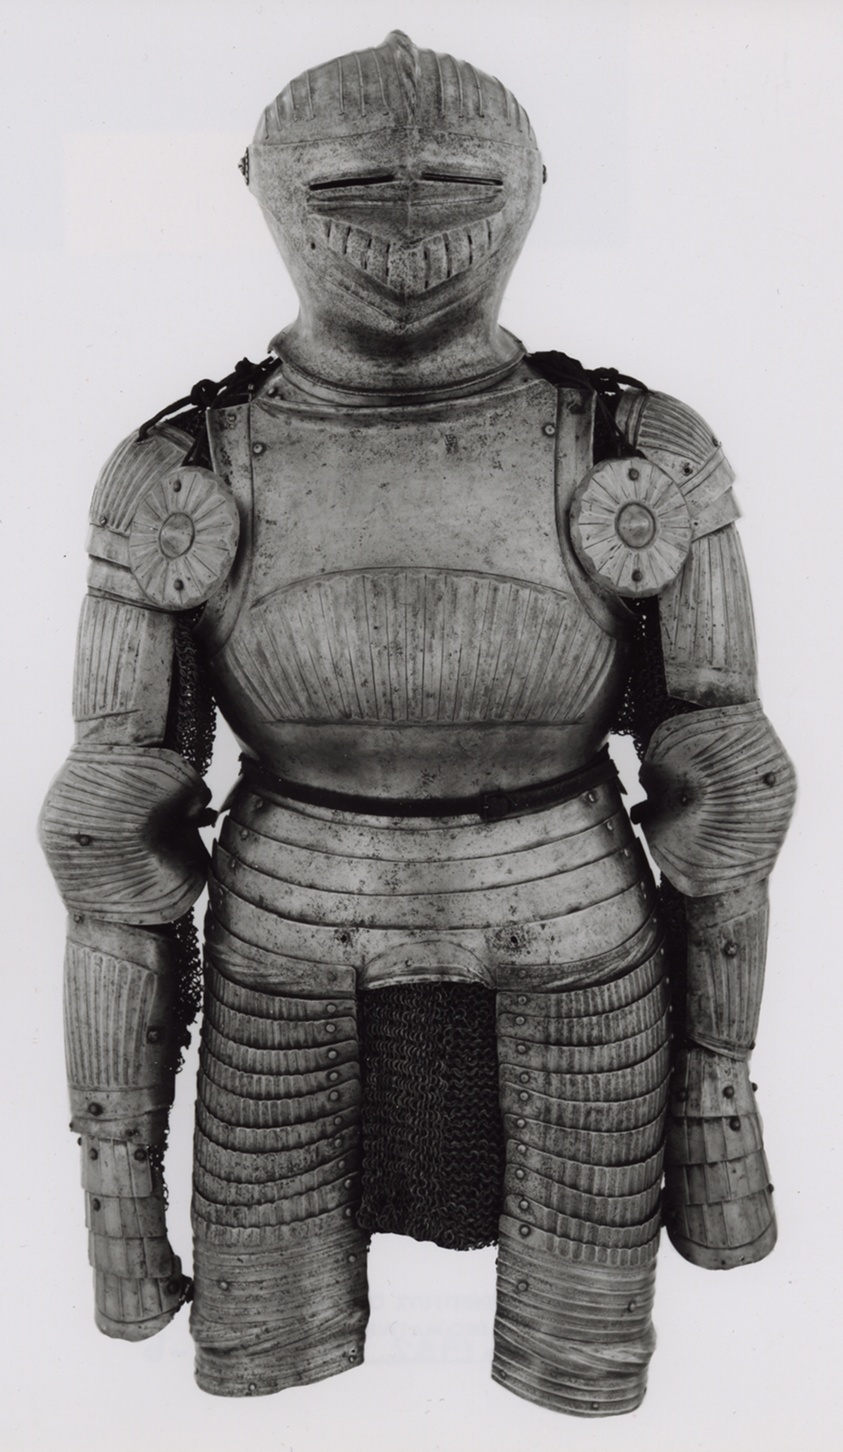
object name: Armor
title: Infantry Armor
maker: German, possibly Cologne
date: 1510/15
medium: Steel and leather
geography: Cologne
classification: suit; armor; arms and armor